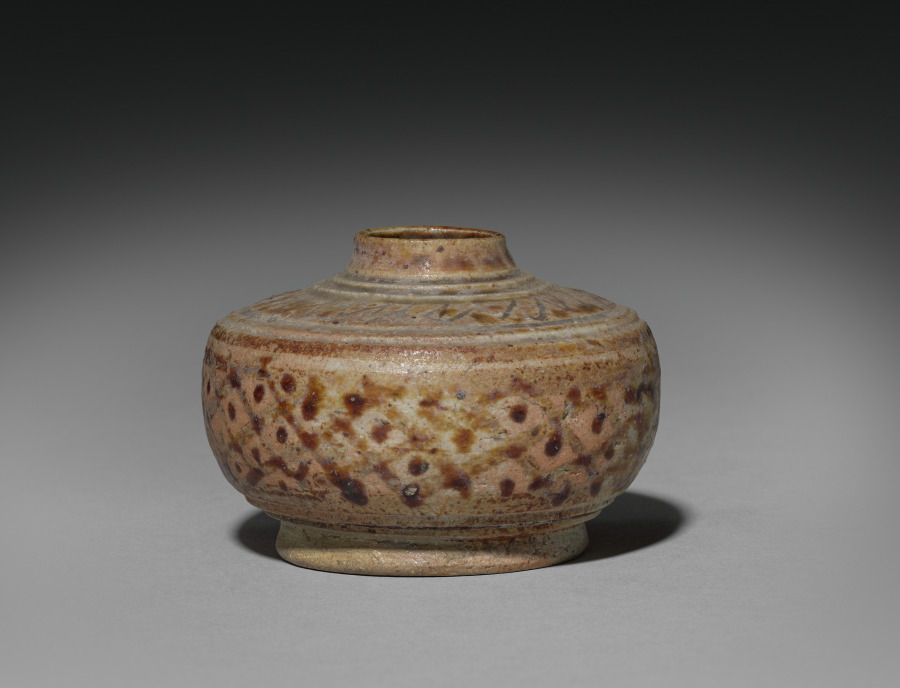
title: Bottle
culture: Siam, Sawankhalok ware, 15th century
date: 1400s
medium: stoneware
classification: Ceramic